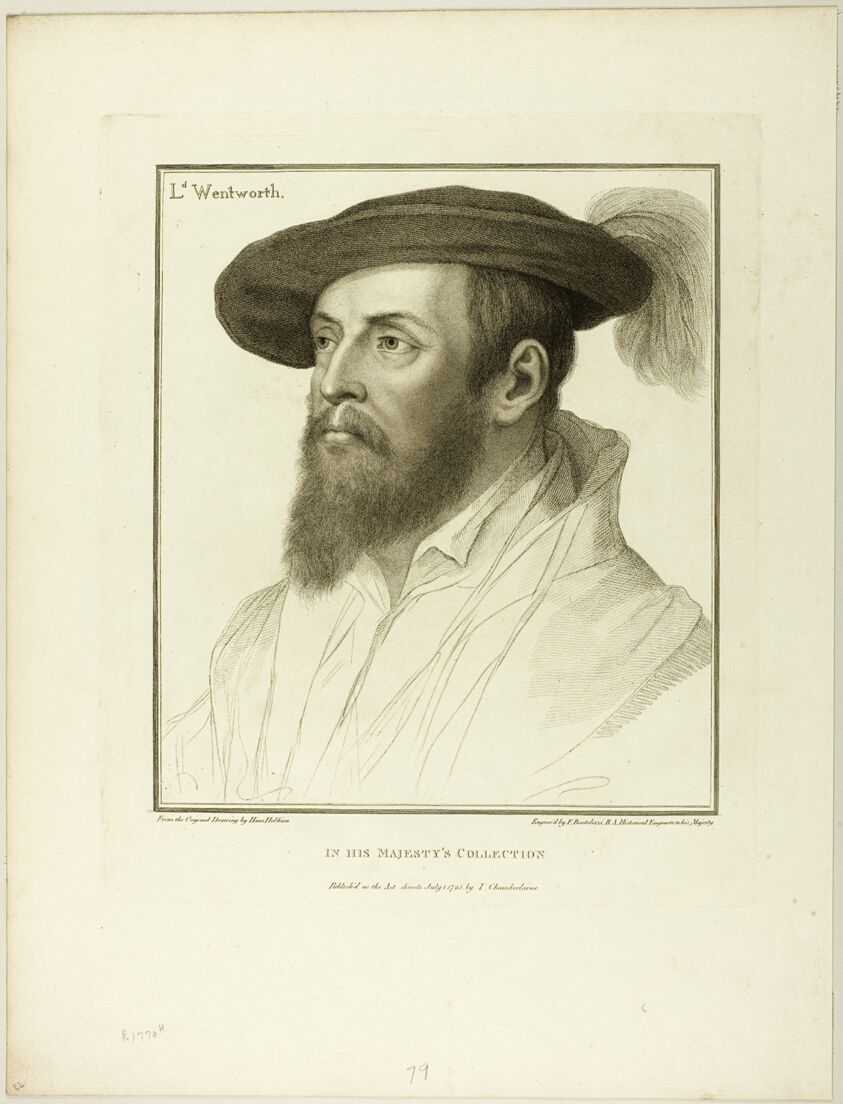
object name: Print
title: Lord Wentworth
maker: Francesco Bartolozzi (Italian, 1727-1815); after Hans Holbein the younger (German, 1497-1543)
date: July 1, 1793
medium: Stipple engraving on ivory laid paper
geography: Italy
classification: engraving; print; prints and drawing